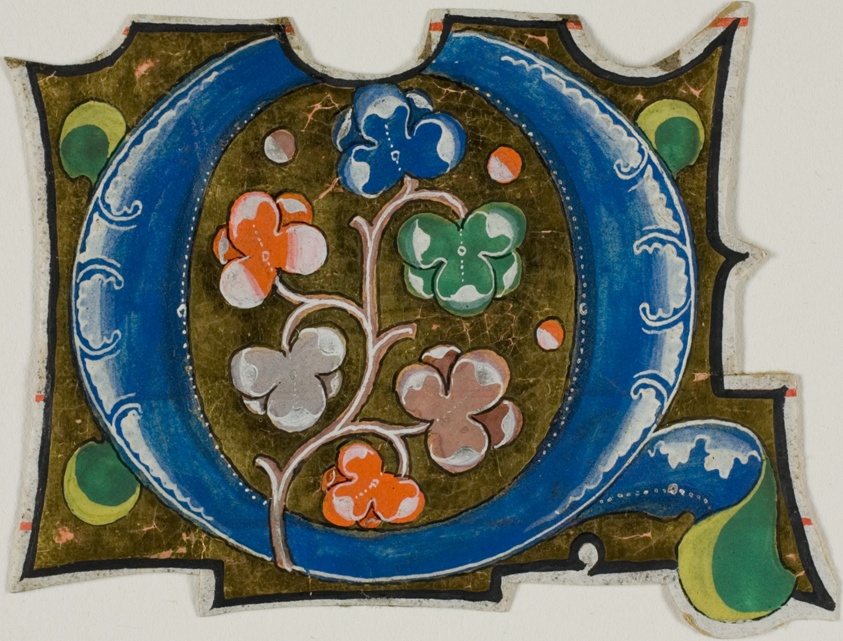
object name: Drawing and Watercolor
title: Decorated Initial "Q" with Three Balls and Six Leaves from a Choir Book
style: medieval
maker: European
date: 14th century or modern, c. 1920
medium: Manuscript cutting in tempera and gold leaf on vellum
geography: Europe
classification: drawings (visual works); manuscript; prints and drawing